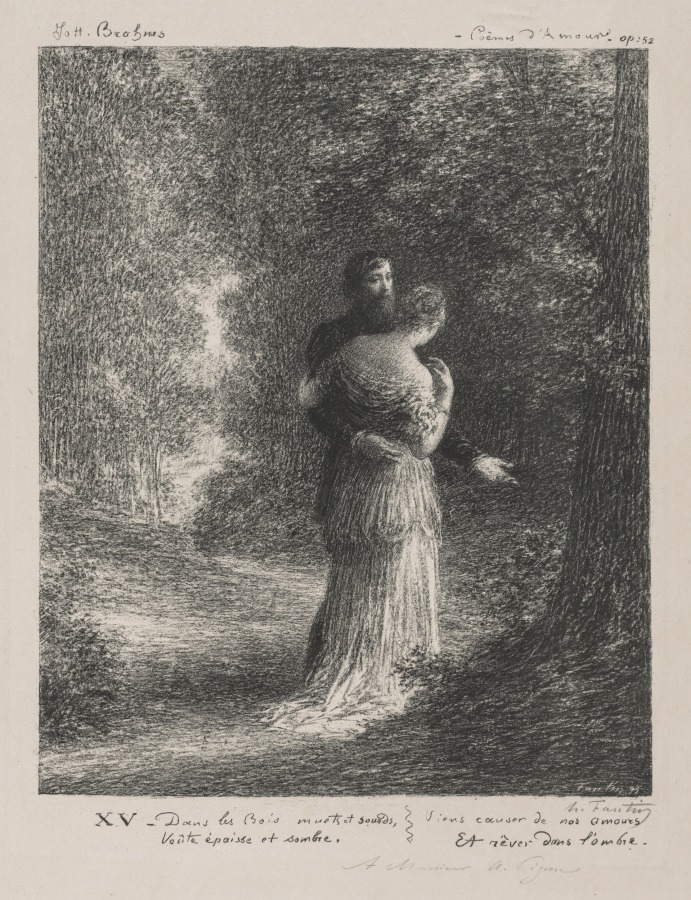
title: Love Poems (Third Plate)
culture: France, 19th century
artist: Henri Fantin-Latour (French, 1836–1904)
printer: Lemercier (French)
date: 1893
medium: lithograph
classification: Print